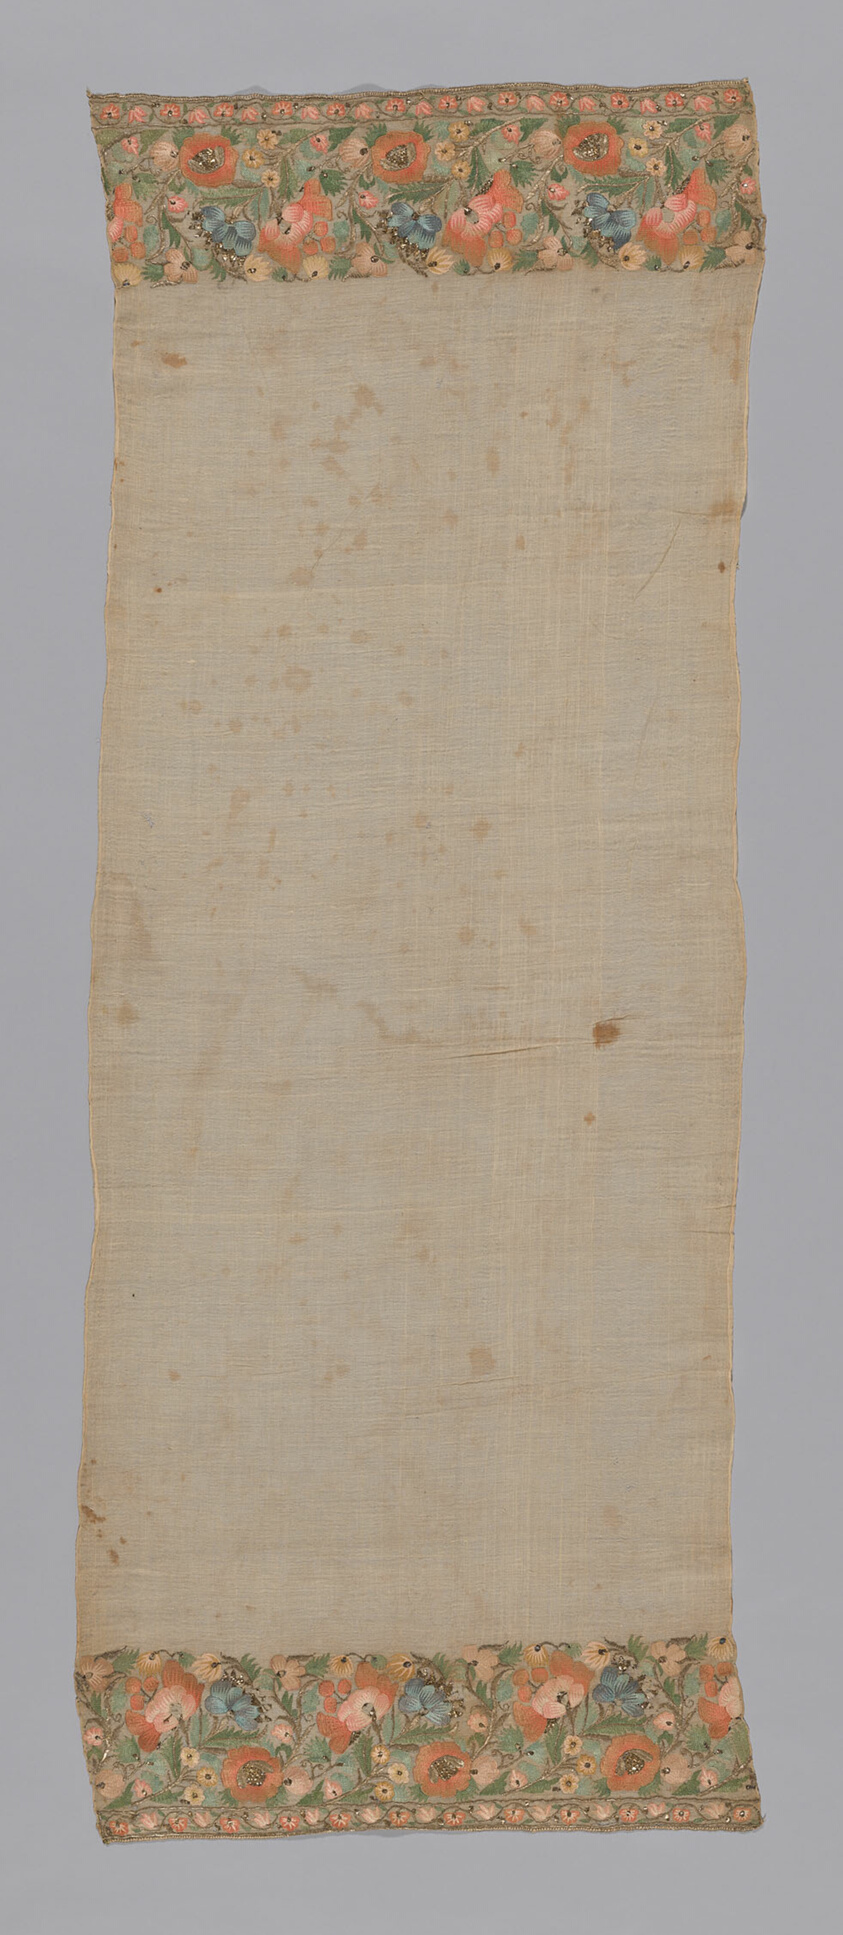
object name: Textile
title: Towel or Napkin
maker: Turkey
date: 19th century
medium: Towel, embroidered with design of floral motifs.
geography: Turkey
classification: textile; needlework (visual works); weaving